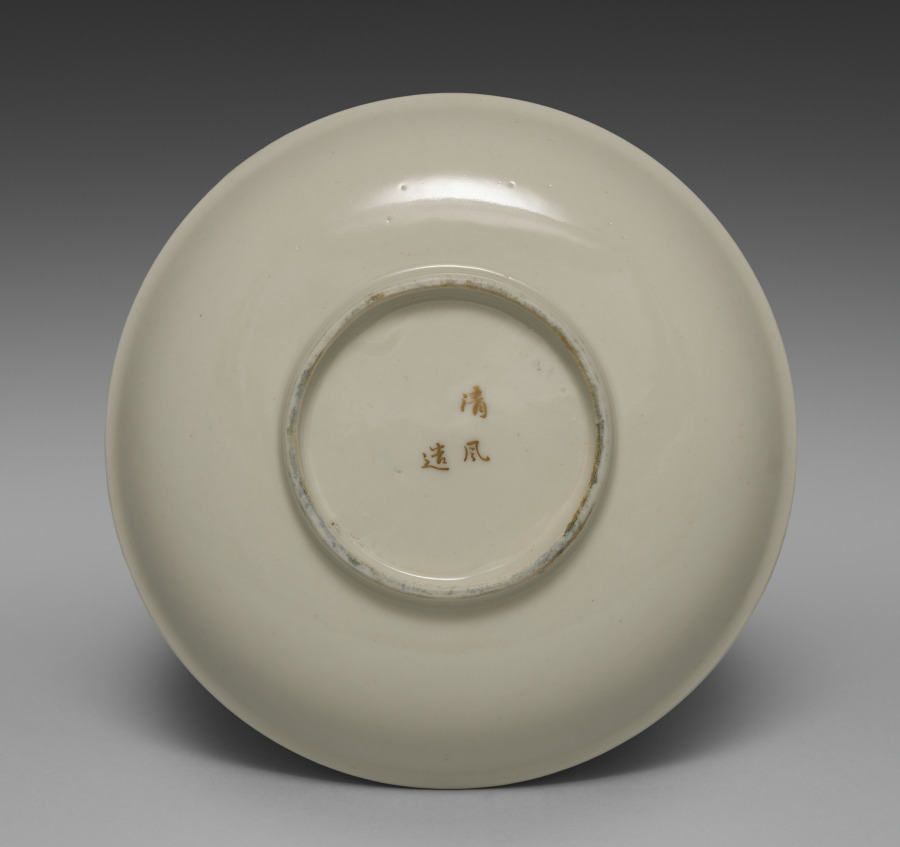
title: Medium-sized Dish from Dining Set with Plum Blossoms and Cracked-Ice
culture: Japan, Meiji period (1868–1912)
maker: Seifū Yohei II (Japanese, 1844–1878)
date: c. 1875–78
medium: Porcelain with molded designs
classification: Ceramic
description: Each item in this set has a delicate low-relief design of flowering plum branches over scattered, intersecting lines meant to resemble the cracked-ice surface of a frozen body of water and is signed on the base in gold pigment. While Yohei II produced many fine works in underglaze blue, like those produced by Kiyomizu Shichibei, he also made works in quite different styles later in his career, from the early 1870 s. In 1873, he was appointed purveyor to the Industrial Center of Kyoto Prefecture, a designation associated with Kyoto’s efforts to reach an international market through the port of Kobe; and from 1875 until his death, he was involved in national-level projects to present Japanese ceramics across the world. It was during this period that Yohei III was apprenticed to Yohei II, and it has been suggested that this set may in fact be an early example of Yohei III’s work, which he signed with his teacher’s name. Decorated with flowers resembling Japanese textile motifs, the set calls to mind the design of Yohei II’s pair of vases with plum blossoms in the Victoria and Albert Museum. Here, the elaborate trees created for a formal public exhibition setting have been translated into the approachable blossoms of the genteel domestic environment. While the designs are consistent across the pieces, each raised flower petal and pistil and each incised line in the ice was done by hand, so the cups, bowls, and dishes are similar yet unique. The bottoms of two boxes once identified the set’s owner, but the information has been deliberately obscured with black ink. However, inscriptions still visible appear to indicate two occasions, once at the end of July 1886 , and once again in June 1916 , when parts of the set were requested from Hokura in Niigata Prefecture. The location corresponds to a neighborhood in the present-day city of Jōetsu. The surname Tsuji 辻 also appears on a paper tag affixed to one of the box cloths. Future research may possibly reveal more about their provenance. A vase by Yohei III in a private collection combines the formal grandeur of the Yohei II vases in the Victoria and Albert Museum with the gentler design of this dining set, placing flowering plum trees against soft, scalloped-edge clouds resembling those in golden screens.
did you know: The dining wares have a creamy white coloration that the four boxes containing them identify as Korean in style.